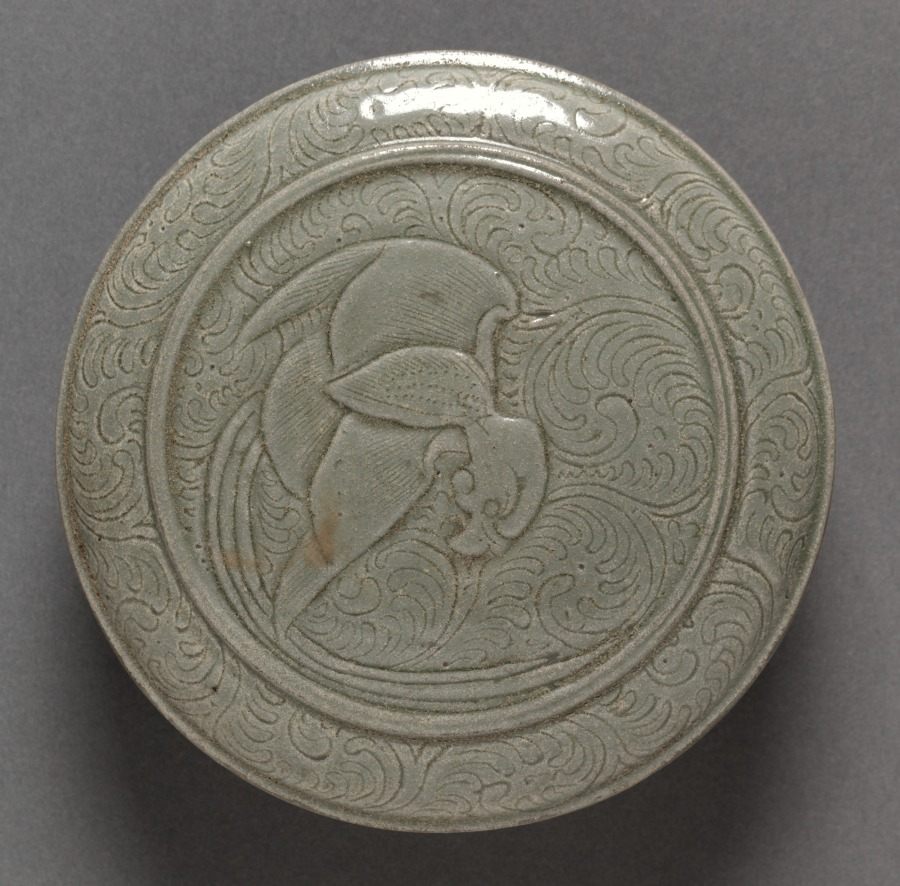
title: Covered Box: Yue Ware (lid)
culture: China, Shang-lin-hu kilns, Yu-yao District, Zhejiang province, Five dynasties (907-960)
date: 907–960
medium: glazed stoneware with incised decoration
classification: Ceramic